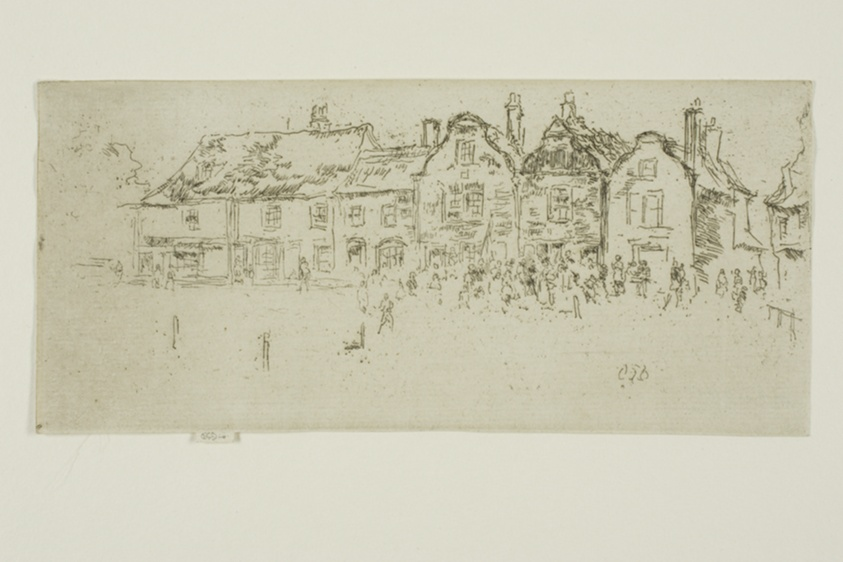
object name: Print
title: Salvation Army, Sandwich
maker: James McNeill Whistler (American, 1834-1903)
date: 1887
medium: Etching and drypoint with foul biting on cream laid paper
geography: United States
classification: etching; drypoint; foul biting; print; prints and drawing; paper